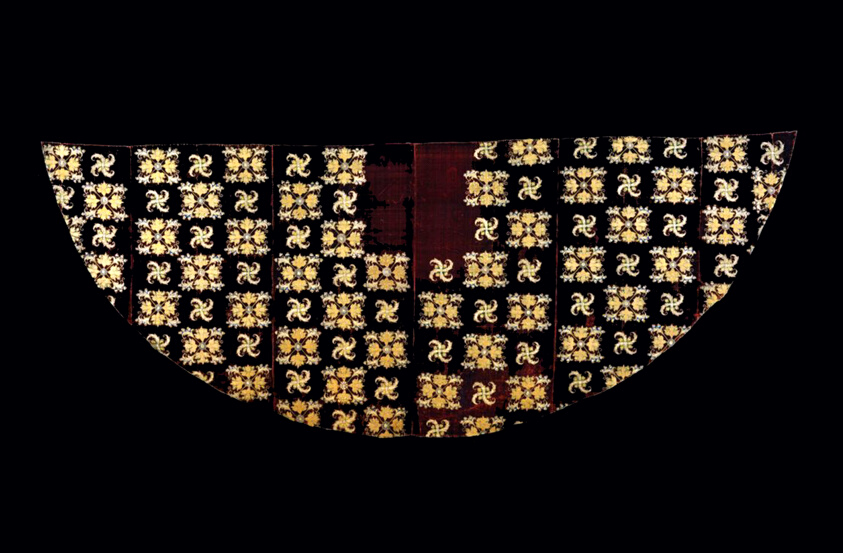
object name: Textile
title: Cope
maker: Italy or Spain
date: 1500/25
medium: Silk warp-float faced broken twill weave with supplementary pile warps forming cut solid velvet; appliquéd with silk and silvered-metal wire, plain weave with twill interlacings of secondary binding warps and supplementary patterning wefts; embroidered with silk and gilt- and silvered-metal-strip-wrapped silk and cotton in satin and split stitches; couching and padded couching; four full panels and two partial panels joined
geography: Italy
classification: textile; needlework (visual works); weaving; weaving - velvet; liturgical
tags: flowers, medallions